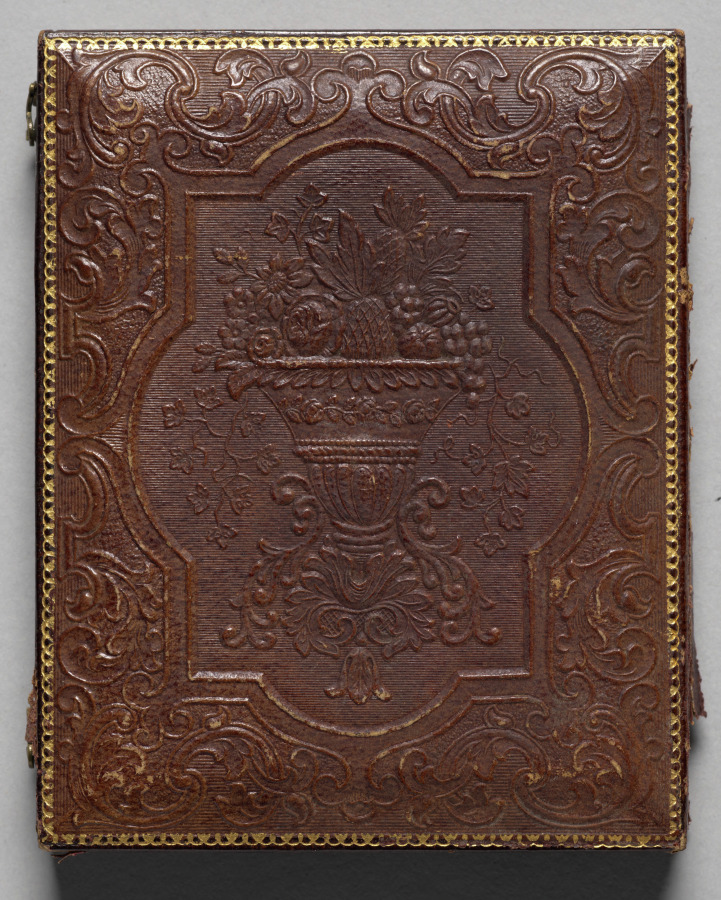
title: Cyrus B. Hills, Postmaster, Arlington, Vermont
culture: America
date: c. 1852–53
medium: daguerreotype, quarter plate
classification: Photograph